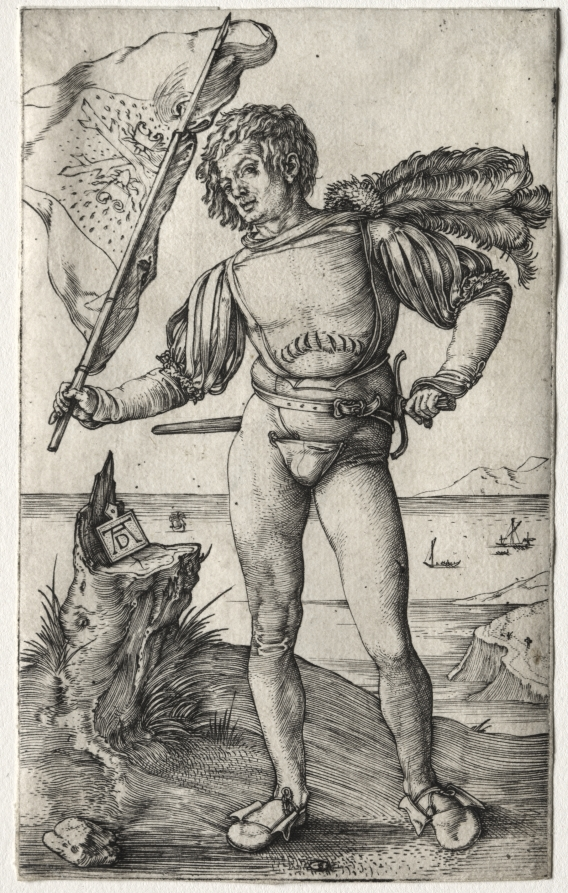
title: The Burgundian Standard Bearer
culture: Germany, late 15th-early 16th Century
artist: Albrecht Dürer (German, 1471–1528)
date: c. 1500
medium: engraving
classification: Print